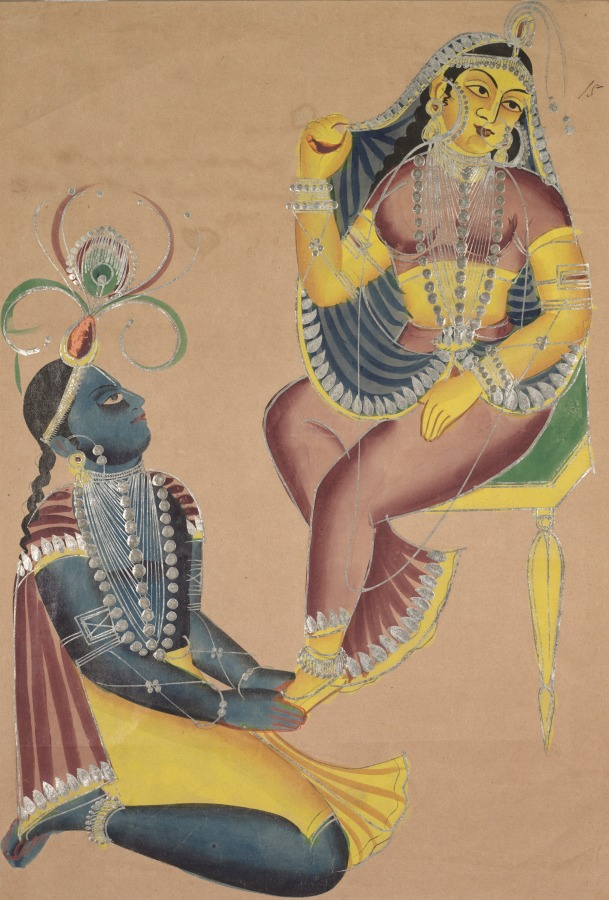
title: Krishna Stroking Radha's Feet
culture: Eastern India, Bengal, Kolkata, Kalighat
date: c. 1890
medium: Gum tempera, graphite, ink, and tin on paper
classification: Painting